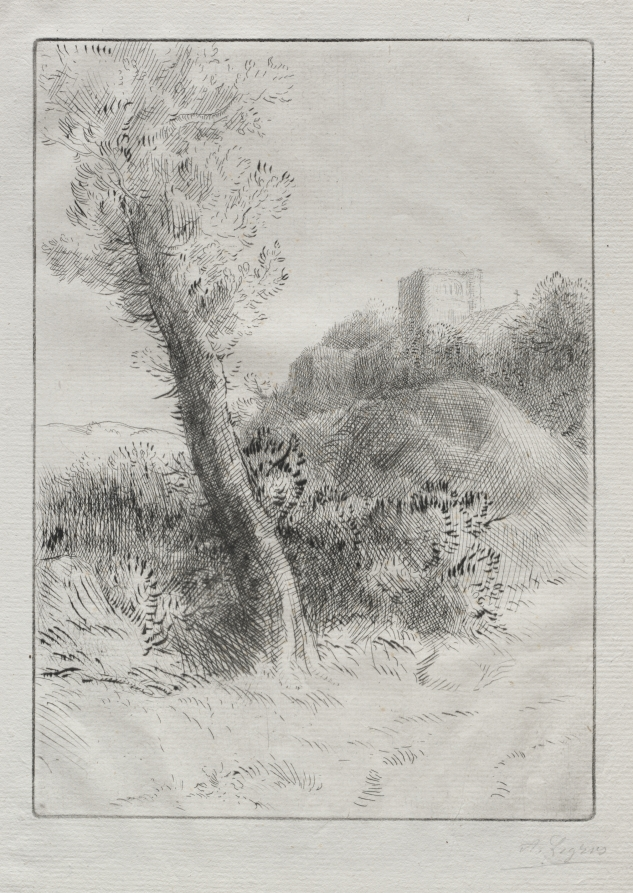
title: Landscape (Paysage)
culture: France, 19th century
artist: Alphonse Legros (French, 1837–1911)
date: c. 1857–1911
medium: drypoint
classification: Print